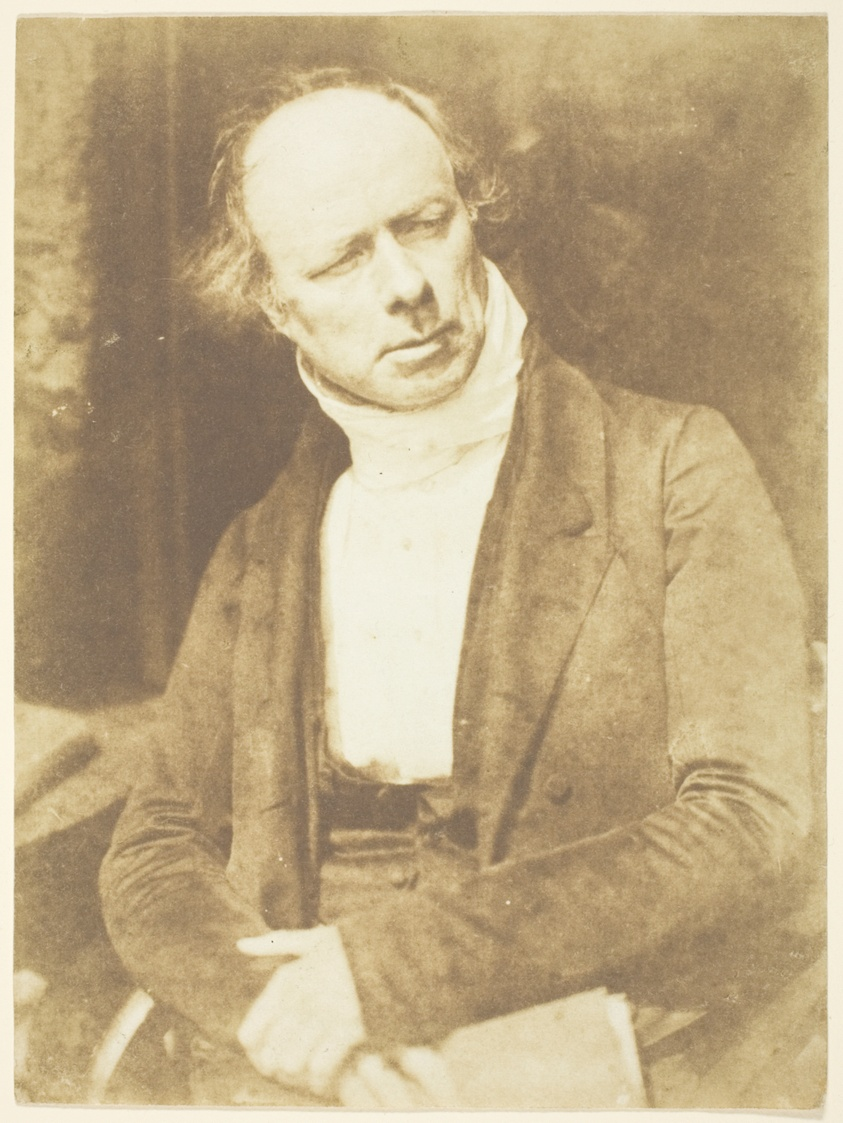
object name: Photograph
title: [The] Revd Mr [Thomas Henshaw] Jones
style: 19th century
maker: David Octavius Hill (Scottish, 1802–1870) and; Robert Adamson (Scottish, 1821–1848)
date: 1843/46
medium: Salted paper print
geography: Scotland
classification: salted paper print; photographic process; photography; photograph